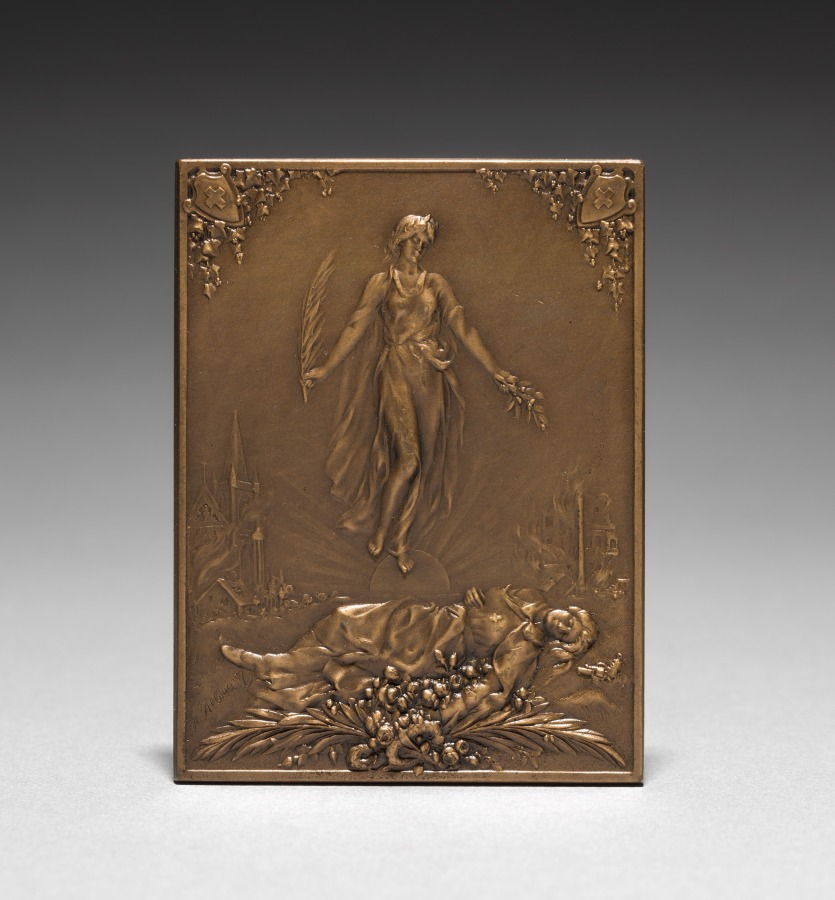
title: Medallion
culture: France, 19th-20th century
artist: Henri Emile Allouard (French, 1844–1929)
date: 1916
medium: bronze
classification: Metalwork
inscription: "Aux dames de la Croix rouge. Virtus Caritas."